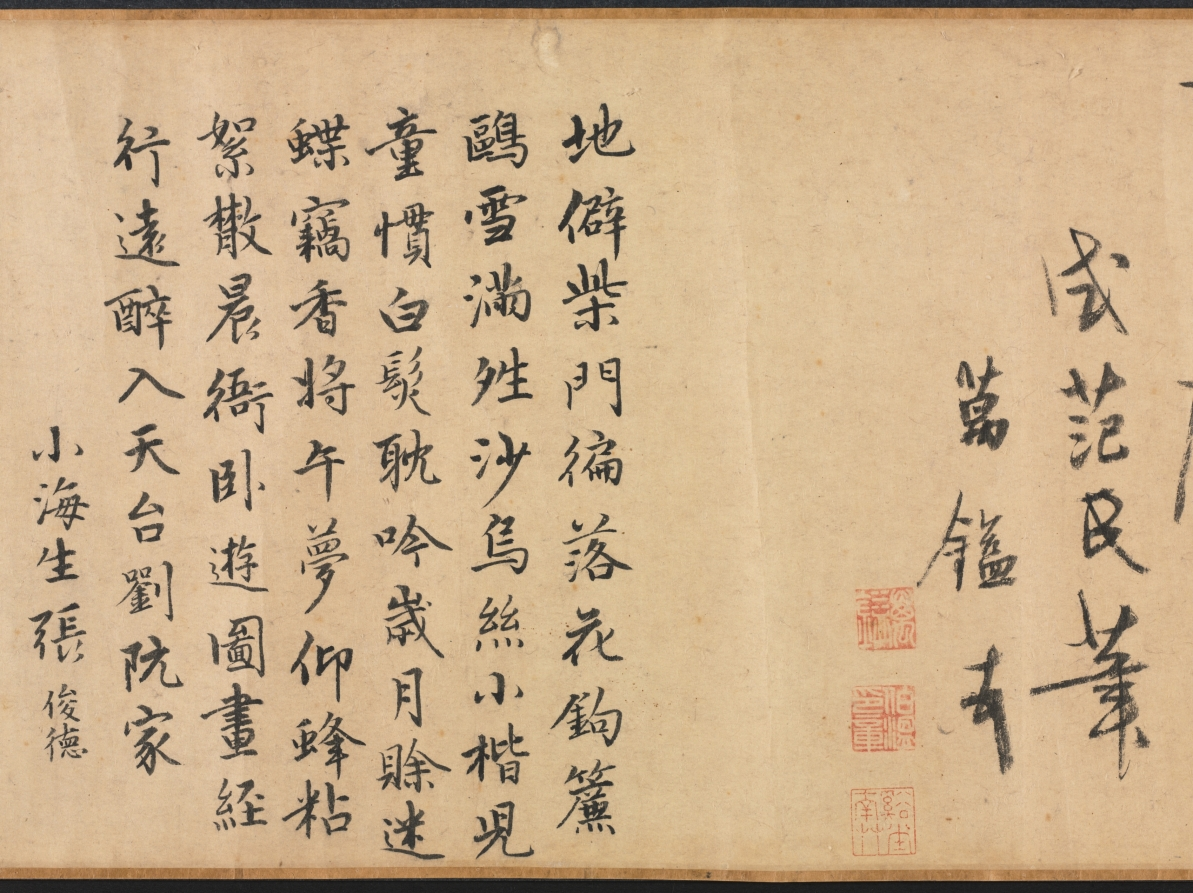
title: Leisure Enough to Spare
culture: China, Yuan dynasty (1271-1368)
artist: Yao Tingmei (Chinese, active mid-1300s)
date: 1360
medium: handscroll, ink on paper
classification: Painting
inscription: 至正廿年春正月_日作此併系鄙語于尾 地偏人遠閉柴關，滿院松陰白晝閒。 眼底風塵渾忘却，坐看流水臥看山。 吳興姚廷美畫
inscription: 23 colophons and 53 seals (dates unavailable for some): 1 colophon, dated 1360, and 2 seals of Yang Weizhen (1296-1370); 1 colophon and 3 seals of Wan Yi; 1 colophon of Zhang Junde; 1 colophon and 3 seals of Angji (act. ca. mid-14th c.); 1 colophon and 1 seal of Xu Shiquan; 1 colophon and 3 seals of Gao Yu; 1 colophon and 2 seals of Li Mingfu; 1 colophon and 2 seals of Lu Lin; 1 colophon and 1 seal of Zhang Qian; 1 colophon of Tao Tangwen; 1 colophon and 1 seal of Wu Yuangui (act. ca. 1300-60); 1 colophon of Bao Jiong; 1 colophon of Wang Zao; 1 colophon and 1 seal of Ma Chuyi; 1 colophon and 1 seal of Lin Yizhuang; 1 colophon and 1 seal of Gu Shunju; 1 colophon and 2 seals of Wang Jing; 1 colophon and 2 seals of Lin Shouchang; 1 colophon and 1 seal of Gao Zhidao; 1 colophon of Lin Xun; 1 colophon, dated 1359, and 2 seals of Meng Weicheng (act. mid-14th c.); 1 colophon and 1 seal of Meng Zhiji (act. mid-l4th c.); 14 seals of Liang Qingbiao 梁清標 (1620-1691); 1 poem dated 1755 and 5 seals of the Qianlong 乾隆 emperor (r. 1736-95); 2 seals of the Jiaqing 嘉慶 emperor (r. 1796-1821); 3 seals of the Xuantong 宣統 emperor (r. 1909-11).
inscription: Title on frontispiece by Zhang Bi 章弼: Signed Gongchen 拱辰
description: Seclusion and leisure—the ideals of the literati, or scholar-gentlemen—are expressed in this mature work by Yao Tingmei. The theme acquired special meaning at a time of the military uprisings near the end of the Yuan dynasty. Dedicated to an ascetic named Du, this work combines painting, calligraphy, and poetry; following the painting are more than 20 poems and essays written by notable scholars, one of whom was the calligrapher Yang Weizhen. It reveals not only the aesthetic taste of the literati but also the practice of contributing artistic and literary works to fulfill social obligations. Yao's painting demonstrates his individual style derived from various ancient masters (Guo Xi, Dong Yuan, and Juran). Yang Weizhen's calligraphy exhibits his bold, vigorous style and his intent to capture the spirit of antiquity in art.